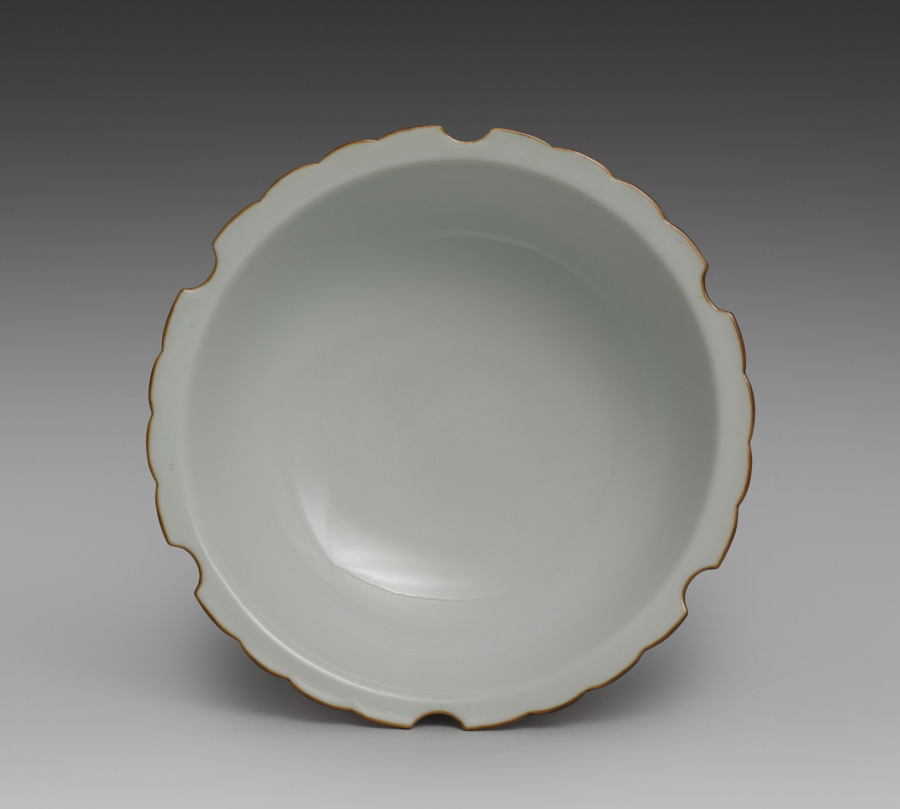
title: Dish from Snow-Flake Side Dishes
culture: Japan, Meiji period (1868–1912)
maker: Seifū Yohei III (Japanese, 1851–1914)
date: 1893–1914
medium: One from a set of six porcelain dishes; porcelain with lobed rims and pink glaze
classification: Ceramic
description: According to the box lid, this set of six side dishes, or mukōzuke, are “snow-flower style” (sekkashiki), having mouths shaped like snowflakes. Their mouths, which have six lobes and scalloped edges, are traced with brown iron oxide at the rim. The outside of each bowl is glazed with a very bright pink over the basin and foot, and the inside is left white. From directly above, one sees a snowflake-like shape, and from the side, they seem to float above a rosy ground.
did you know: The box for this set of dishes has an inscription on the side noting that they were for a person with the family name Nakamoto.